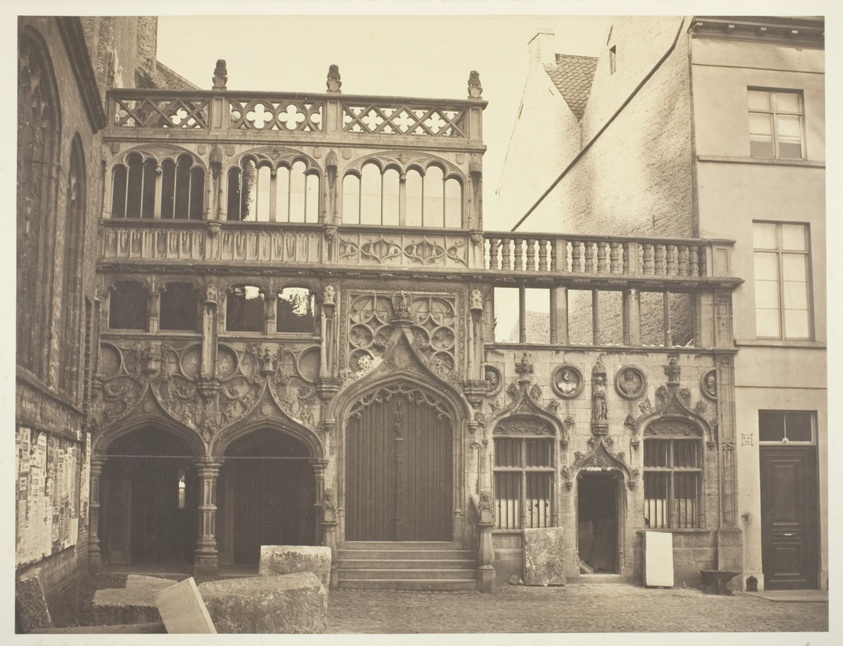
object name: Photograph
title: Chapelle du St. Sang à Bruges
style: 19th century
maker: Bisson Frères (Louis-Auguste Bisson, French, 1814–1876 and; Auguste-Rosalie Bisson, French, 1826–1900)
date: 1854/55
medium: Albumen print, from the album "Reproductions photographiques des plus beaux types d’architecture et de sculpture"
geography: France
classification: albumen silver print; photographic process; photography; photograph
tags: Collected by Hugh Edwards, architecture